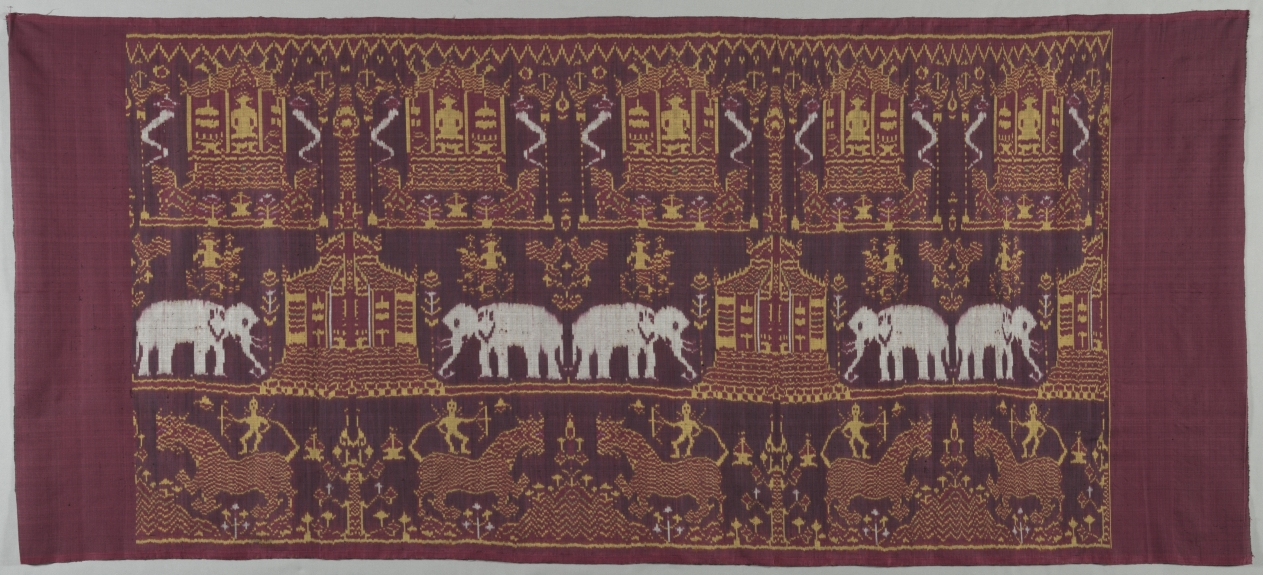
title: Wall Hanging or Ceiling Canopy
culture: Cambodia, Khmer People, early 20th century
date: early 1900s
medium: tabby weave, weft ikat; silk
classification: Textile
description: The silk wefts of this textile were resist dyed with a design of elephants, temples, large tigers (?), sacred trees, and humans before the textile was woven. Both the weft-ikat technique and the motifs reveal the influence of Indian textiles, particularly patola. The dark reddish-maroon color of the ground, however, was not produced by over-dyeing, as in India and Bali, but by the combination of red wefts with black warps. This silk was made to serve as a wall hanging or ceiling canopy in a Buddhist temple.